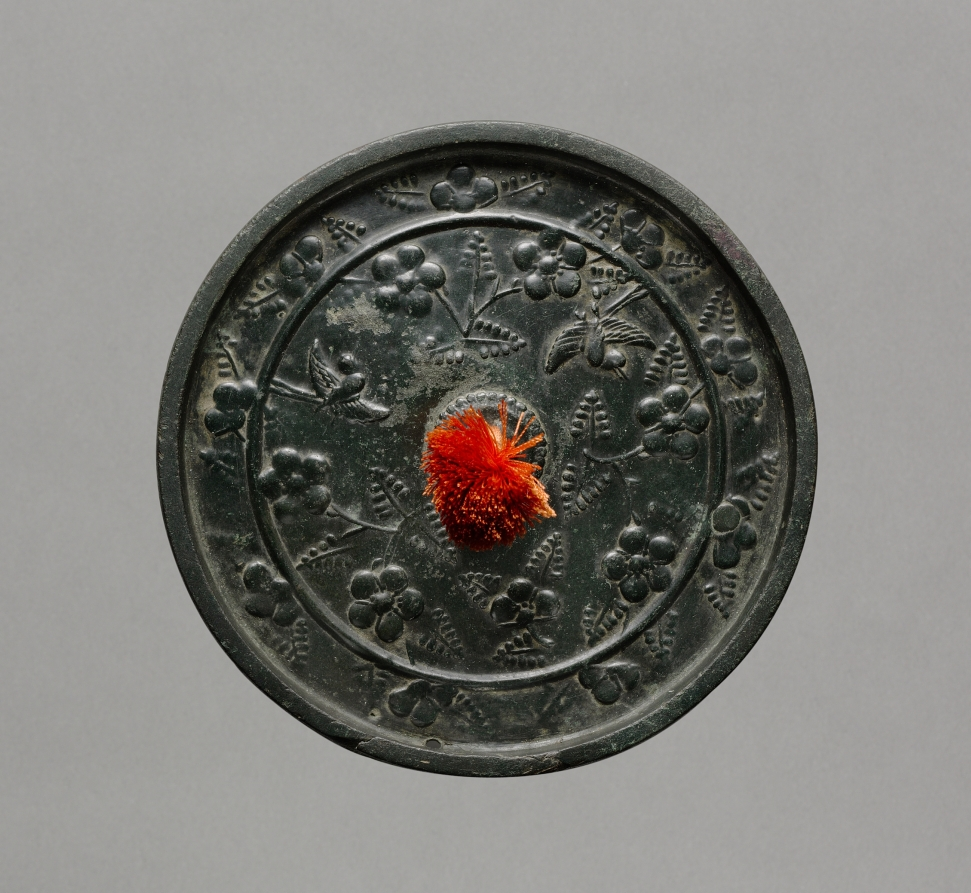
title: Mirror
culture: Japan, Heian period (794–1185)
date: 794–1185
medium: bronze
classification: Metalwork